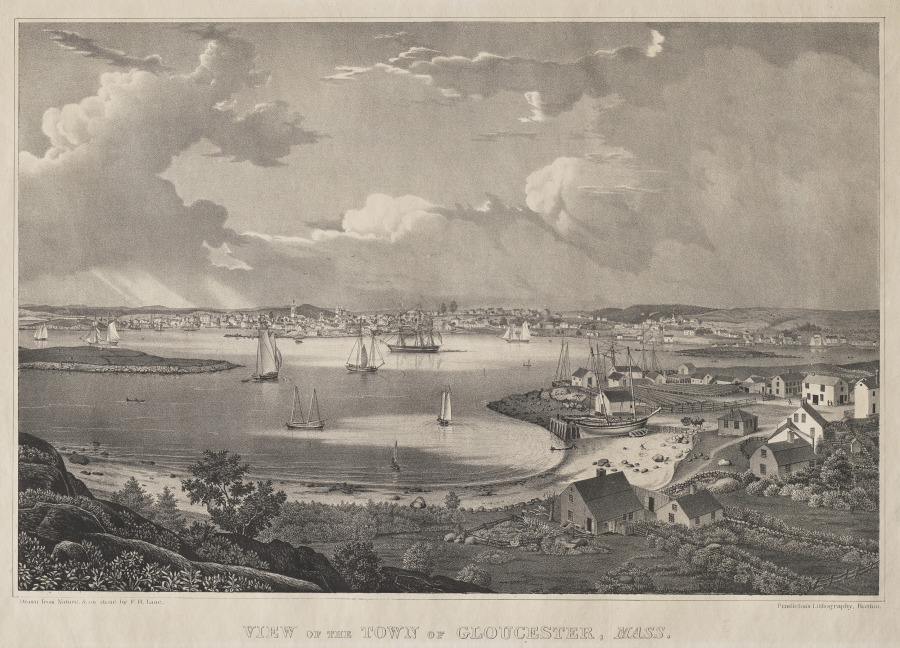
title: View of the Town of Gloucester, Mass.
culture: America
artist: Fitz Henry Lane (American, 1804–1865)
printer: Pendleton's Lithography (American, active 1825–1836)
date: 1835–36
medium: lithograph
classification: Print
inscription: Printed along lower left margin below image: Drawn from Nature & on stone by F.H. Lane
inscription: printed along lower right margin below image: Pendleton’s Lithography, Boston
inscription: printed along lower margin, at center: VIEW OF THE TOWN OF GLOUCESTER, MASS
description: This print depicts the harbor of Gloucester, where Fitz Henry Lane was born. A center for fishing, the town is depicted here as centered on a body of water punctuated by various ships. Lane was known as an early proponent of Luminism, an artistic style that focused on precise depiction of light and atmospheric effects, such as the dramatic sunlight seen through the clouds and on the water’s surface here.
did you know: Fitz Henry Lane made this print while working at the shop of the Boston lithographer Pendleton, who issued it by subscription to the public.